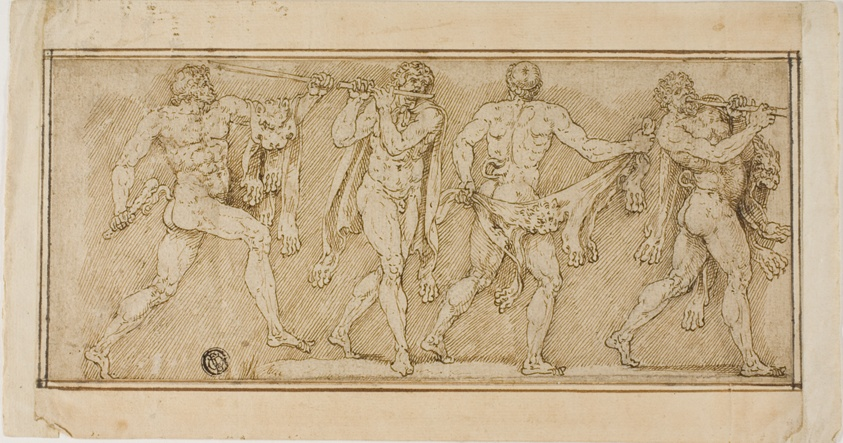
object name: Drawing and Watercolor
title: Frieze of Satyrs Wearing Lion Skins and Playing Pipes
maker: Possibly Lambert Lombard (Flemish, 1506-1566); or possibly after Pietro Santo Bartoli (Italian, 1635-1700)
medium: Pen and brown ink on tan laid paper, laid down on ivory laid paper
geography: Flanders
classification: pen and ink drawings; drawings (visual works); prints and drawing